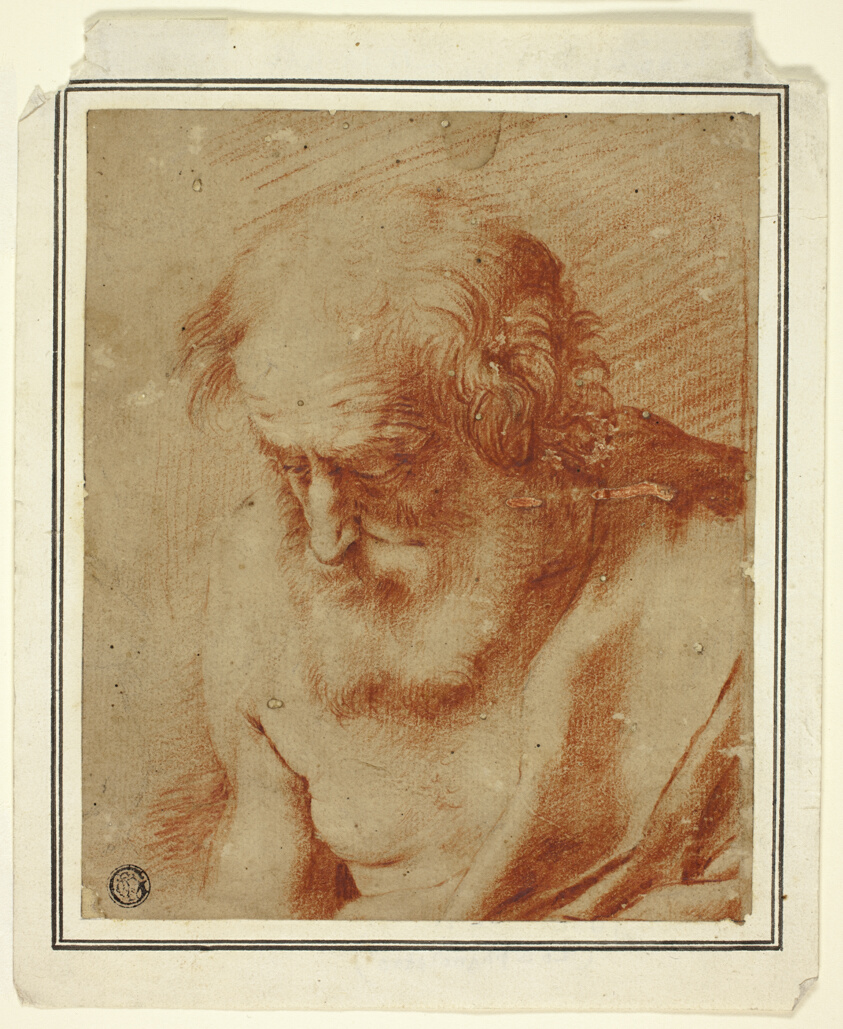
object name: Drawing and Watercolor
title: Saint Jerome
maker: After Guercino; Italian, 1591-1666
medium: Red chalk, with touches of black chalk, on tan laid paper, laid down on ivory laid paper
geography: Italy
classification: chalk; drawings (visual works); prints and drawing